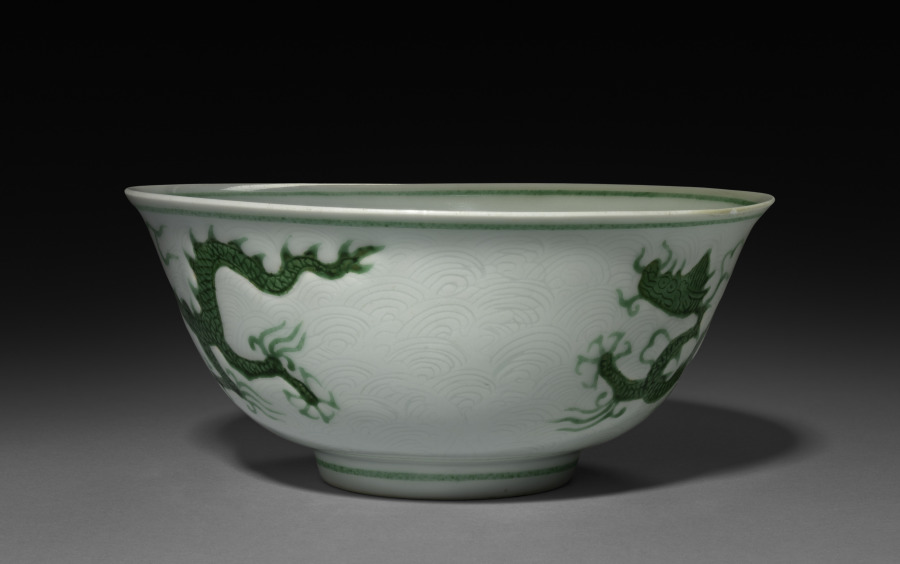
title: Bowl with Dragons in Waves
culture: China, Jiangxi province, Jingdezhen kilns, Ming dynasty (1368-1644), Zhengde mark and reign (1506-21)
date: 1506–21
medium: porcelain with incised decoration and green overglaze enamel and resist enamel decoration on biscuit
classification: Ceramic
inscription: 大明正德年製